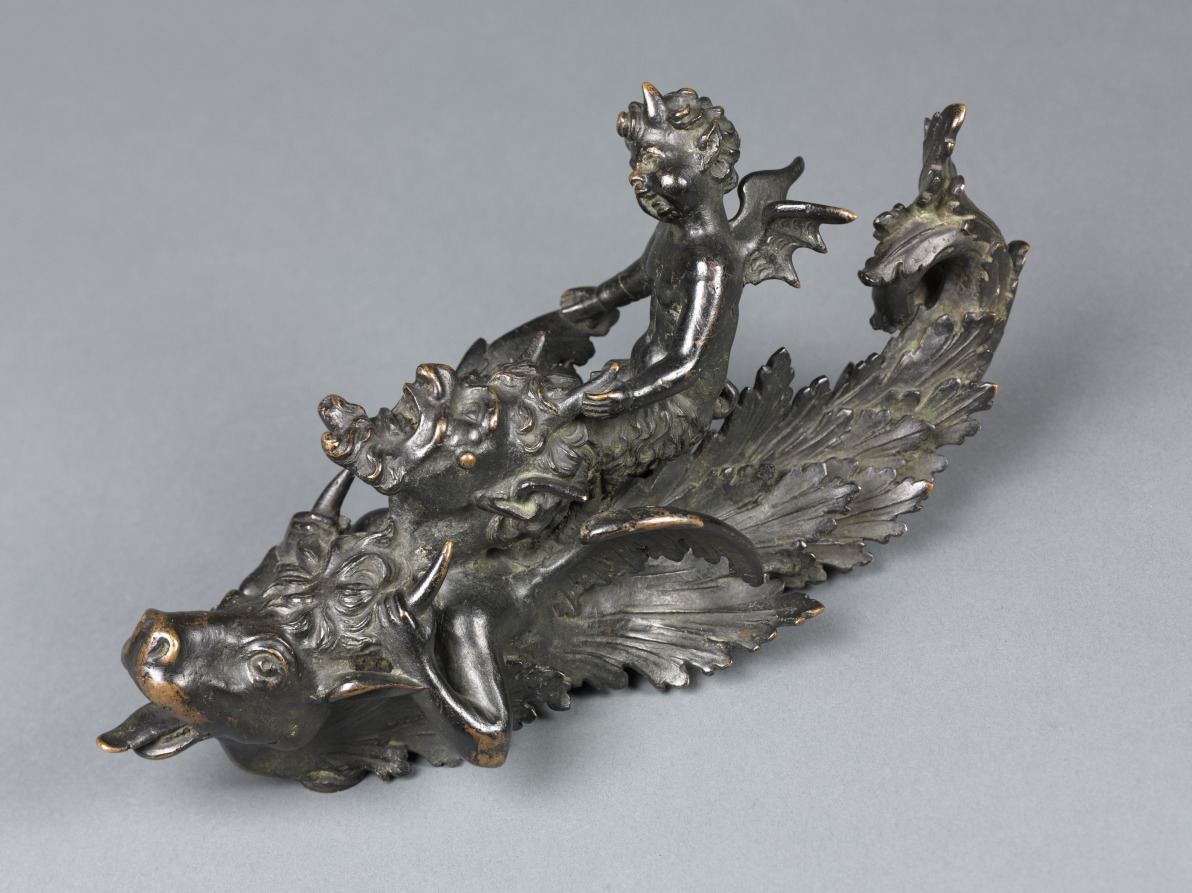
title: Doorknocker with Two Satyrs Riding an Ox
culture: probably Italy, Style of Padua, 16th Century, 19th century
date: 1800s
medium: bronze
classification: Sculpture